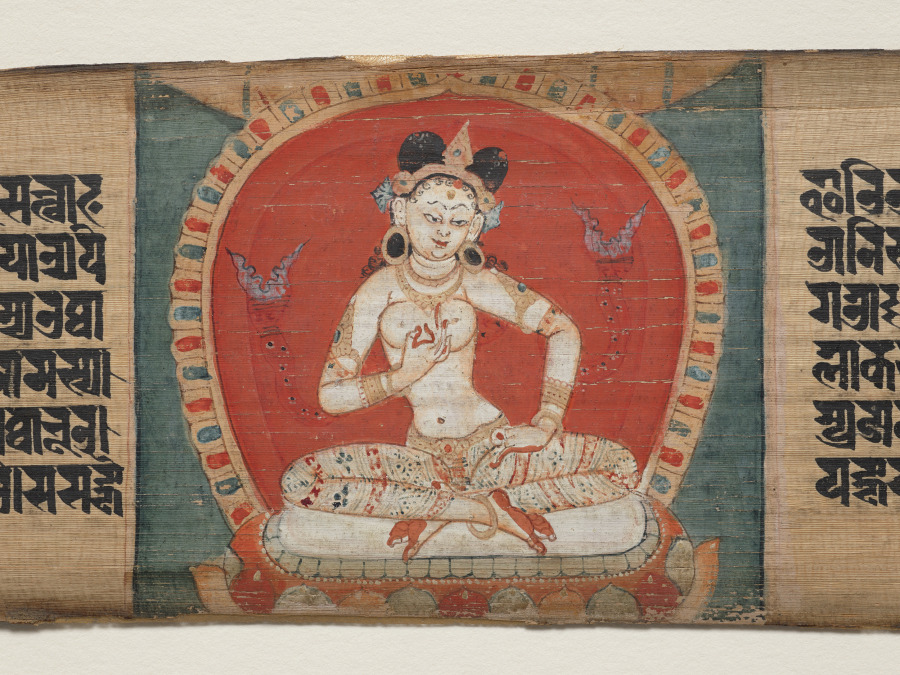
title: Prajnaparamita flanked by a white female figure and a white bodhisattva, folio 90 (recto), from a Manuscript of the Perfection of Wisdom in Eight Thousand Lines (Ashtasahasrika Prajnaparamita-sutra)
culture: Eastern India, Bihar, Vikramashila Monastery. Painting: Nepal, Kathmandu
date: Sunday, September 14, 1119 (year 239 of the Newar Samvat in the month of Ashvina)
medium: gum tempera and ink on palm leaf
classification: Painting